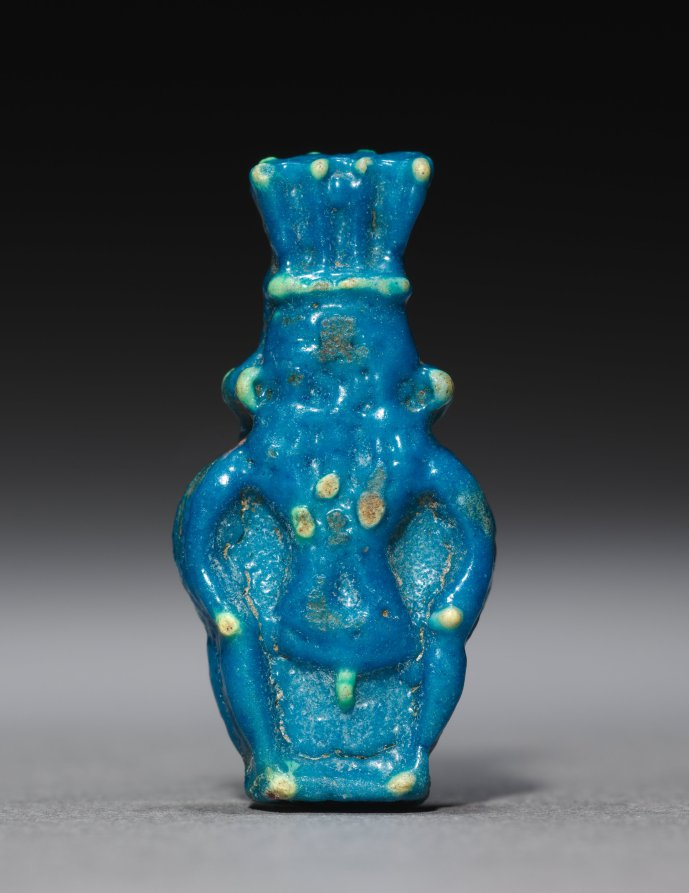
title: Amulet of Bes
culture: Egypt, Greco-Roman period (332 BCE–395 CE), Roman empire (30 BCE–395 CE)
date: 30 BCE–395 CE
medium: polychrome faience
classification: Amulets